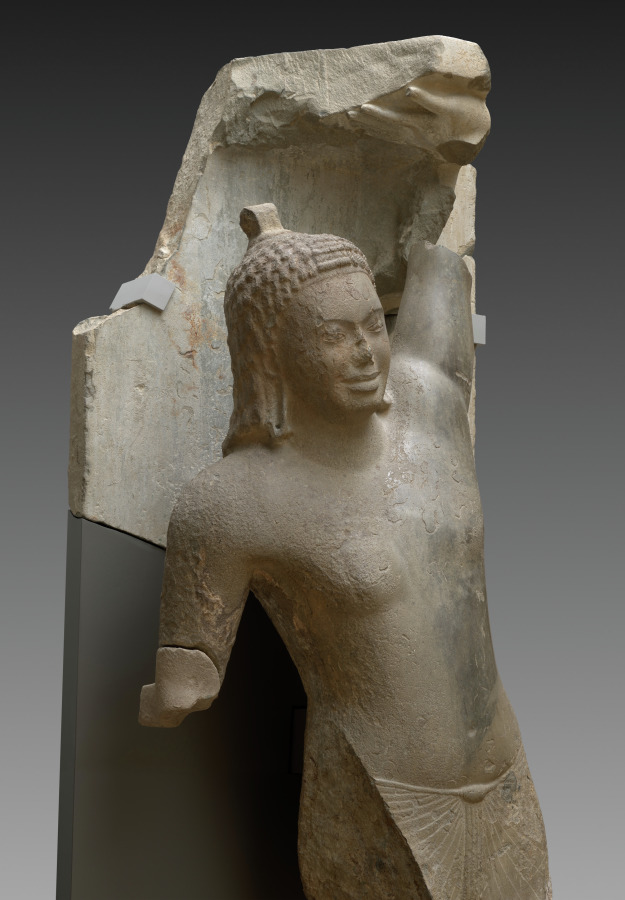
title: Krishna Lifting Mount Govardhan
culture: Southern Cambodia, Takeo Province, Phnom Da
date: c. 600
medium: Sandstone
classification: Sculpture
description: This masterwork of early Cambodian sculpture shows the Hindu god Krishna effortlessly holding aloft a mountain to protect his fellow villagers and herds from torrential storms sent by a jealous old god. It is one of eight monumental monolithic figures recovered from a two-peaked mountain in the floodplains of the Mekong River delta, on the outskirts of the ancient urban center of Angkor Borei.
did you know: Gold earrings were once fastened to the sculpture using holes in the figure's earlobes.